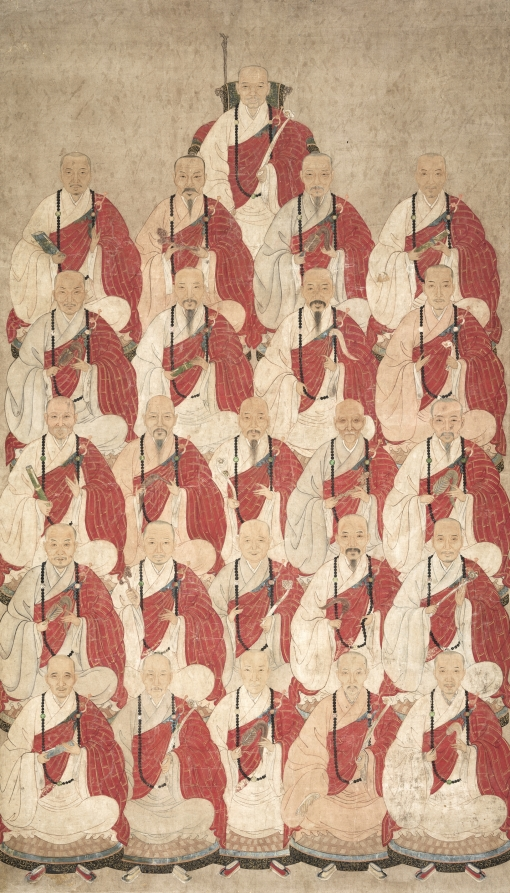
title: Lineage Portrait of Buddhist Monks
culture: China, Qing dynasty (1644–1911)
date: 1600s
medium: hanging scroll mounted on a panel (framed); ink, color, and gold on paper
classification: Painting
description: This painting features 24 Buddhist priests, likely of several generations and members of the same temple or school. The priests are depicted with attention to individual features and appearances, dressed in their formal garments. They may represent monks of the Ōbaku school, a form of Chan (Japanese: Zen) Buddhism founded in Japan by Chinese émigré monks and their Japanese followers.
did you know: The painting has remnants of a Japanese mounting, indicating that it was once kept in Japan.